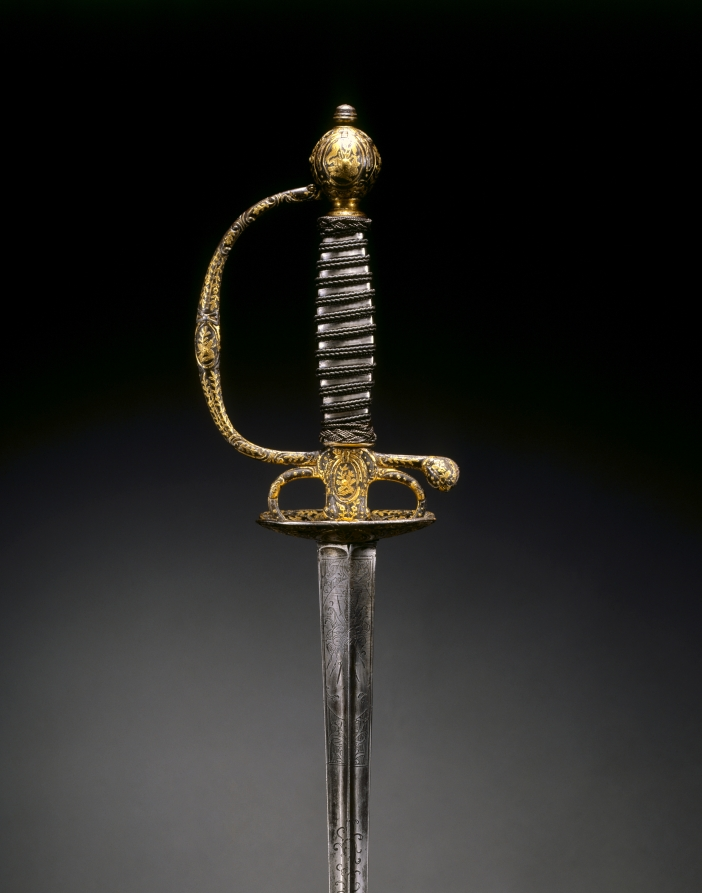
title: Smallsword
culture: France, Paris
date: c. 1730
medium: steel, blued, with gold encrusted decoration; chased and engraved; silver wire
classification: Arms and Armor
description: During the 1700s, the small-sword emerged as a light, quick weapon. Like the rapier it was carried by unarmored civilians, the noblemen of the upper classes. Over time this delicate sword became more an accessory of male attire than a weapon essential to life and death. The sword hilt, which shows even when the blade is sheathed, became the ground for elaborate decoration. These small swords thus represent the final stage in the evolution of the sword, from the edged weapons of antiquity to the elegantly refined blades of the 1700s and 1800s.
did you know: The decorative design of the hilt was often carried down onto the blade, which could be chased or etched with designs, and gilded or blued as seen here.